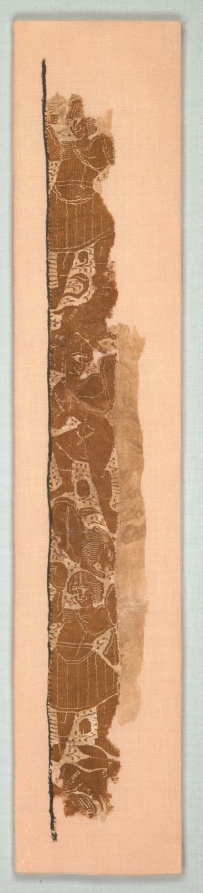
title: Fragment, Part of an Ornament from a Garment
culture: Egypt, Byzantine period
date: 400s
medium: tabby weave with inwoven tapestry ornament, linen and wool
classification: Textile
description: This fragment shows three hunters armed with swords and round shields or rocks alternating with lions and rabbits, evidently the prey. It appears identical in technique, color, and artistic details to 1950.147, and was attached to it inappropriately when acquired by the museum. Presumably, it decorated the hemline with the figures “lying down,” as also seen in the bands flanking the tunic’s neck opening.